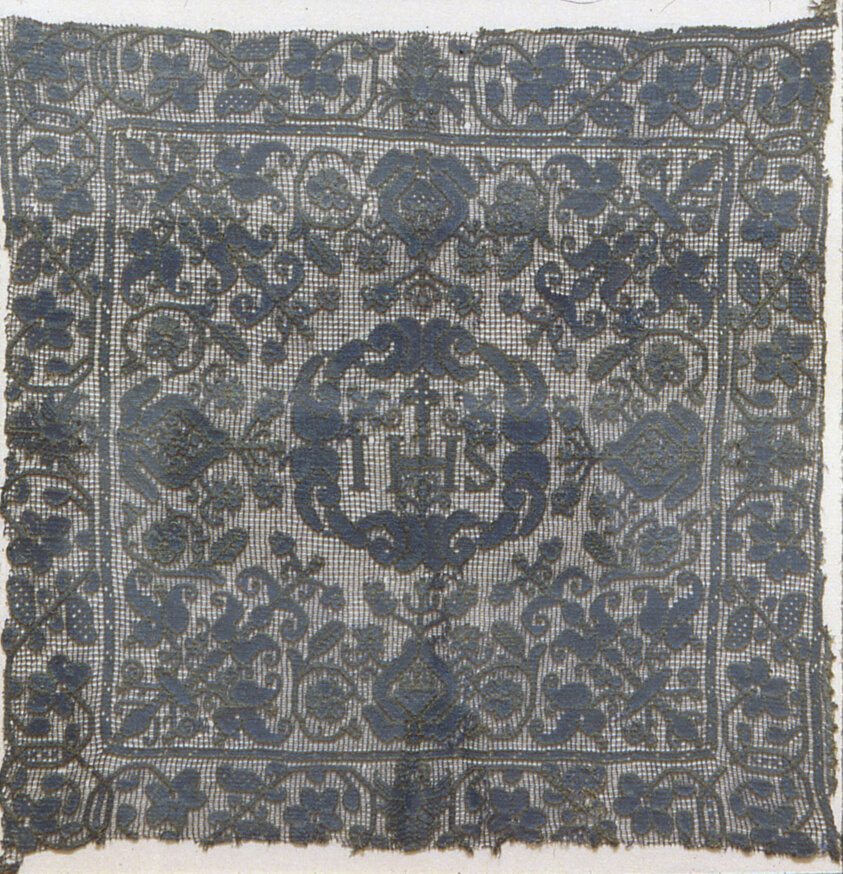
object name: Religious/Ritual Object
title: Chalice Cover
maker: Italy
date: 1601/25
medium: Linen, square netting; embroidered with silk in cloth, darning and interlocking lace stitches; glass beads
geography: Italy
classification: textile; needlework (visual works); ritual objects